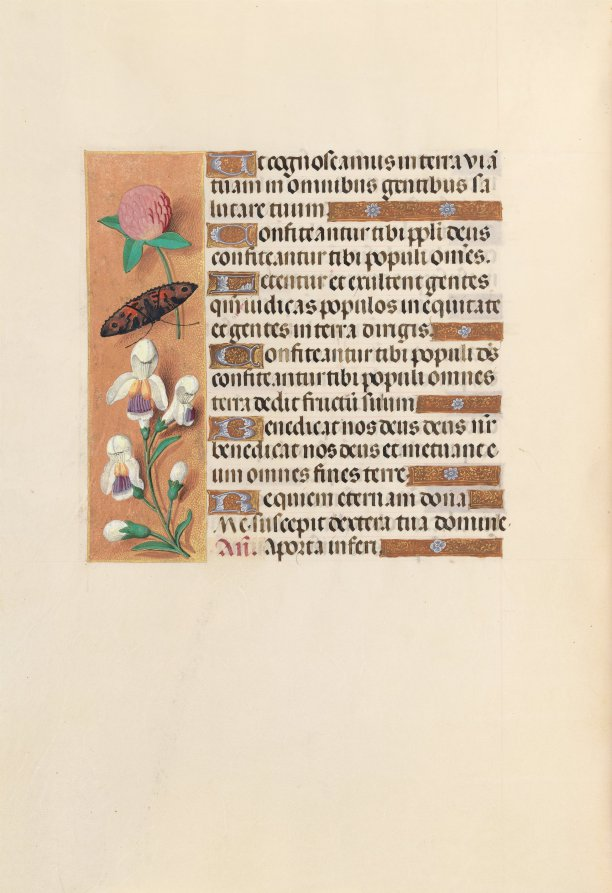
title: Hours of Queen Isabella the Catholic, Queen of Spain: Fol. 250v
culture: Flanders, Ghent and Bruges, late 15th century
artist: Master of the First Prayerbook of Maximillian (Flemish, c. 1444–1519)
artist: and Associates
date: c. 1500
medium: ink, tempera, and gold on vellum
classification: Bound Volume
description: This manuscript was illuminated by a circle of at least five highly organized manuscript painters active in the Flemish cities of Ghent and Bruges. The principal illuminator was Alexander Bening, who painted the majority of the book's miniatures. Manuscripts produced by this circle of artists are renowned for the decoration of their borders, which typically feature a rich variety of realistically-painted flowers, birds, and butterflies. This prayer book, called a book of hours, was intended not for a cleric, but for the private devotions of a lay person-in this case, Isabella the Catholic, Queen of Spain (1451-1504). Isabella's coat of arms embellishes the book's frontispiece. It is unlikely that the book was commissioned by the Queen herself; rather, she probably received it as a diplomatic gift from someone courting her patronage, perhaps Cardinal Francisco Jimenez de Cisneros. A Franciscan friar, Jimenez was dependent upon Isabella for his advancement, first to the post of Queen's confessor in 1492, and then to Archbishop of Toledo in 1495.